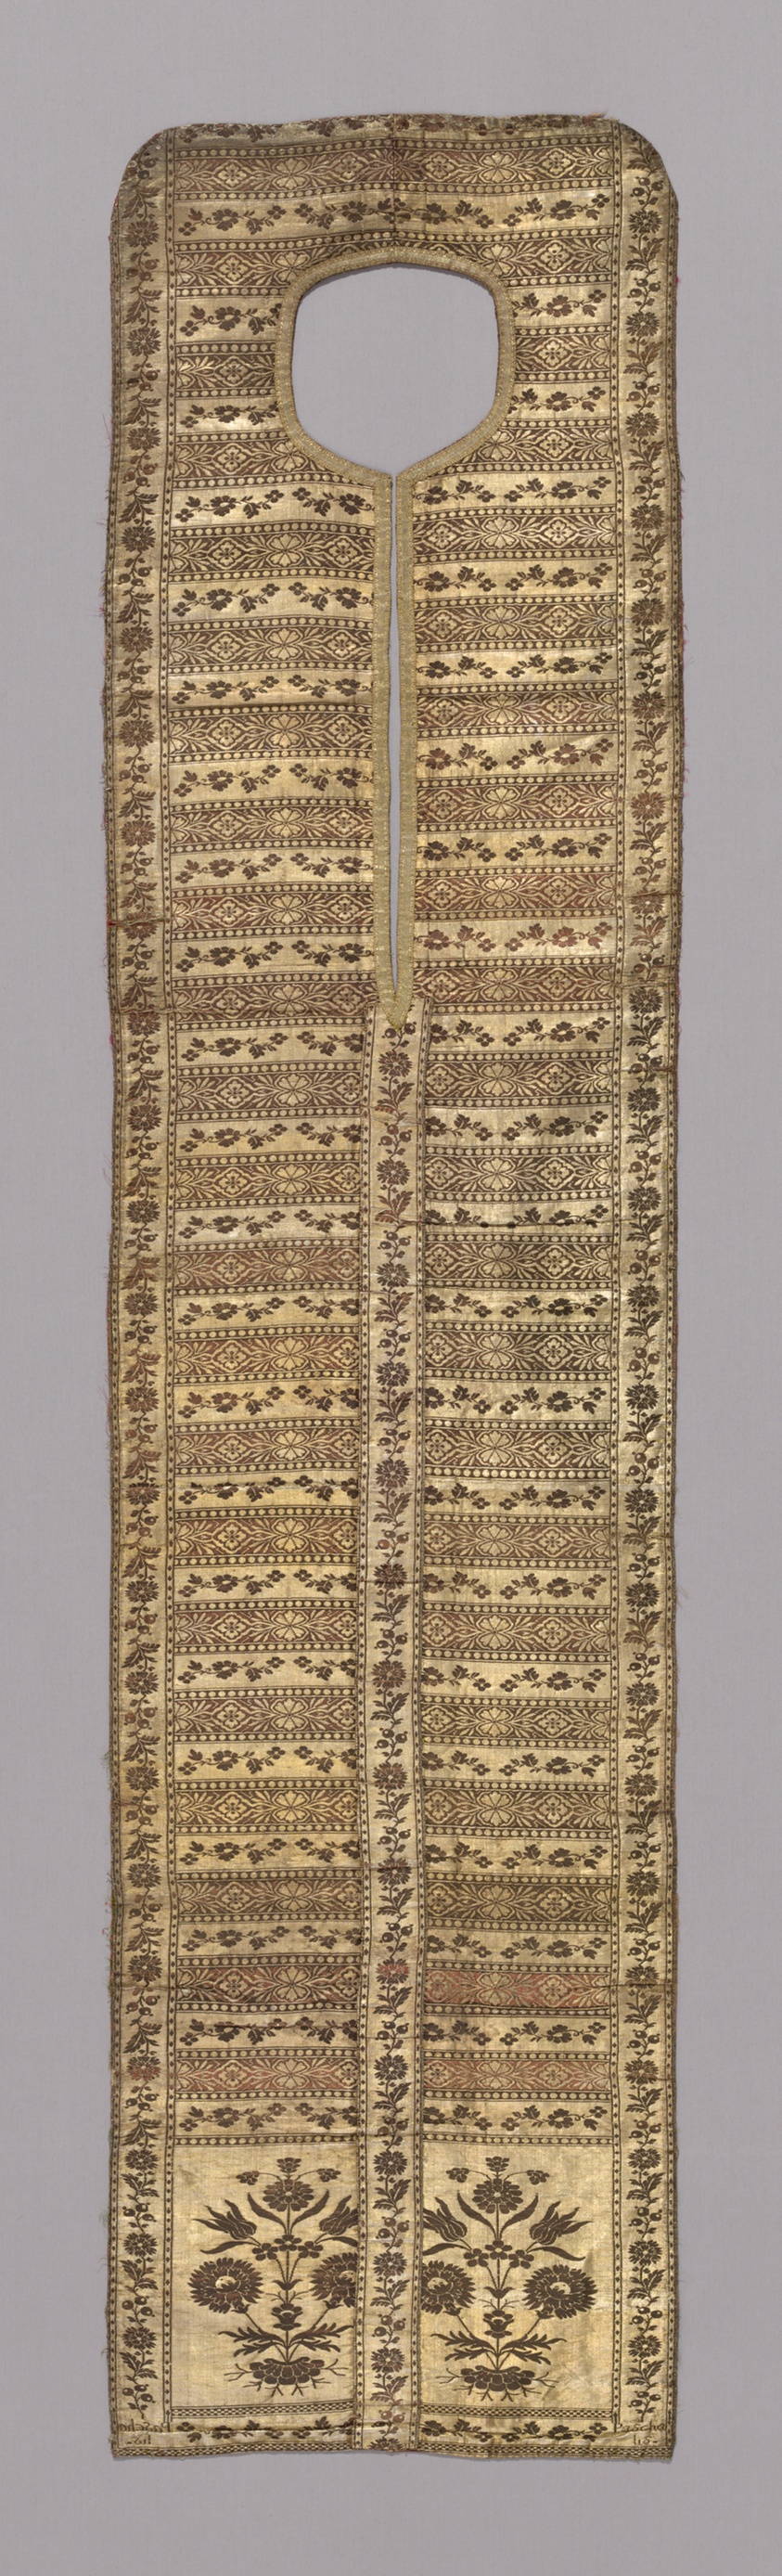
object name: Textile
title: Fragment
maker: Poland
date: 1725/75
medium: Made in form of a cope frontal, gold brocaded, silver ornamented with narrow bands of black and brown flowers;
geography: Poland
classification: textile; weaving; liturgical